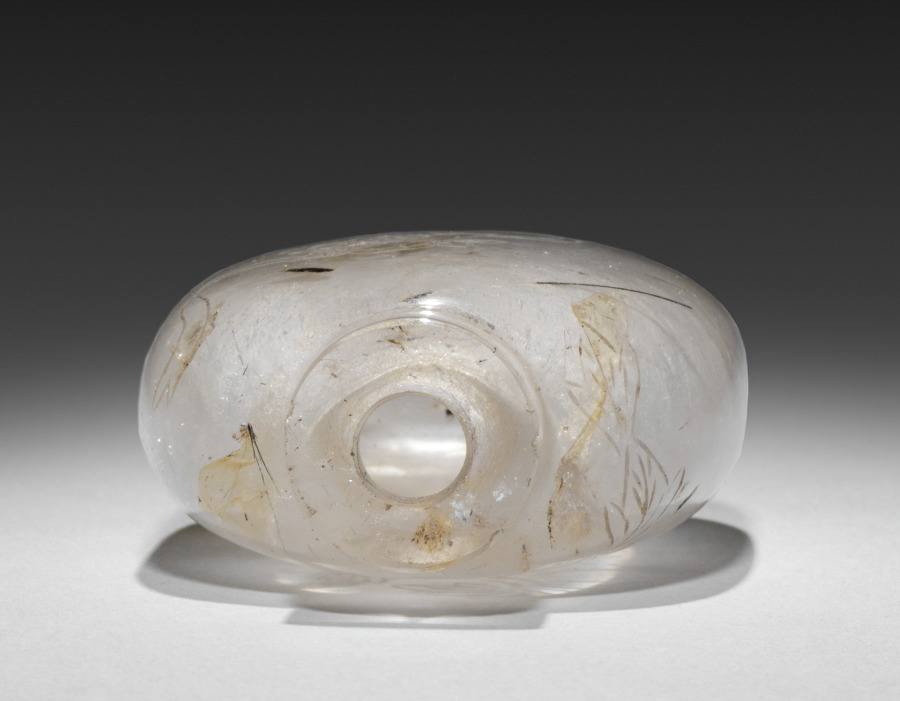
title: Snuff Bottle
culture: China, Qing dynasty (1644-1911)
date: 1644–1911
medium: glass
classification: Glass